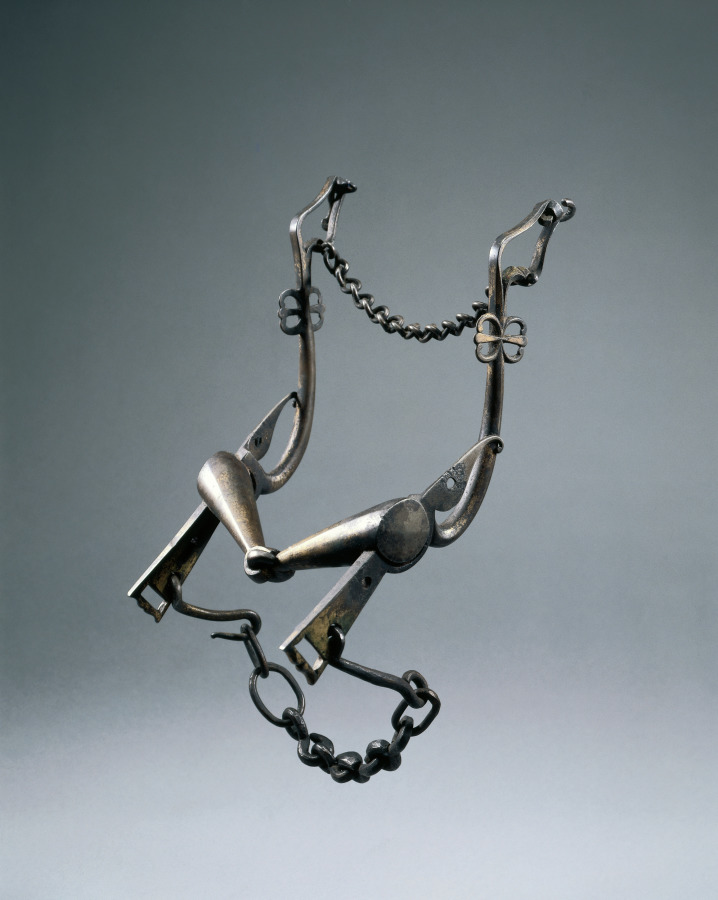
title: Curb Bit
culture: Germany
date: 1500s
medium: steel, traces of gilding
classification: Arms and Armor